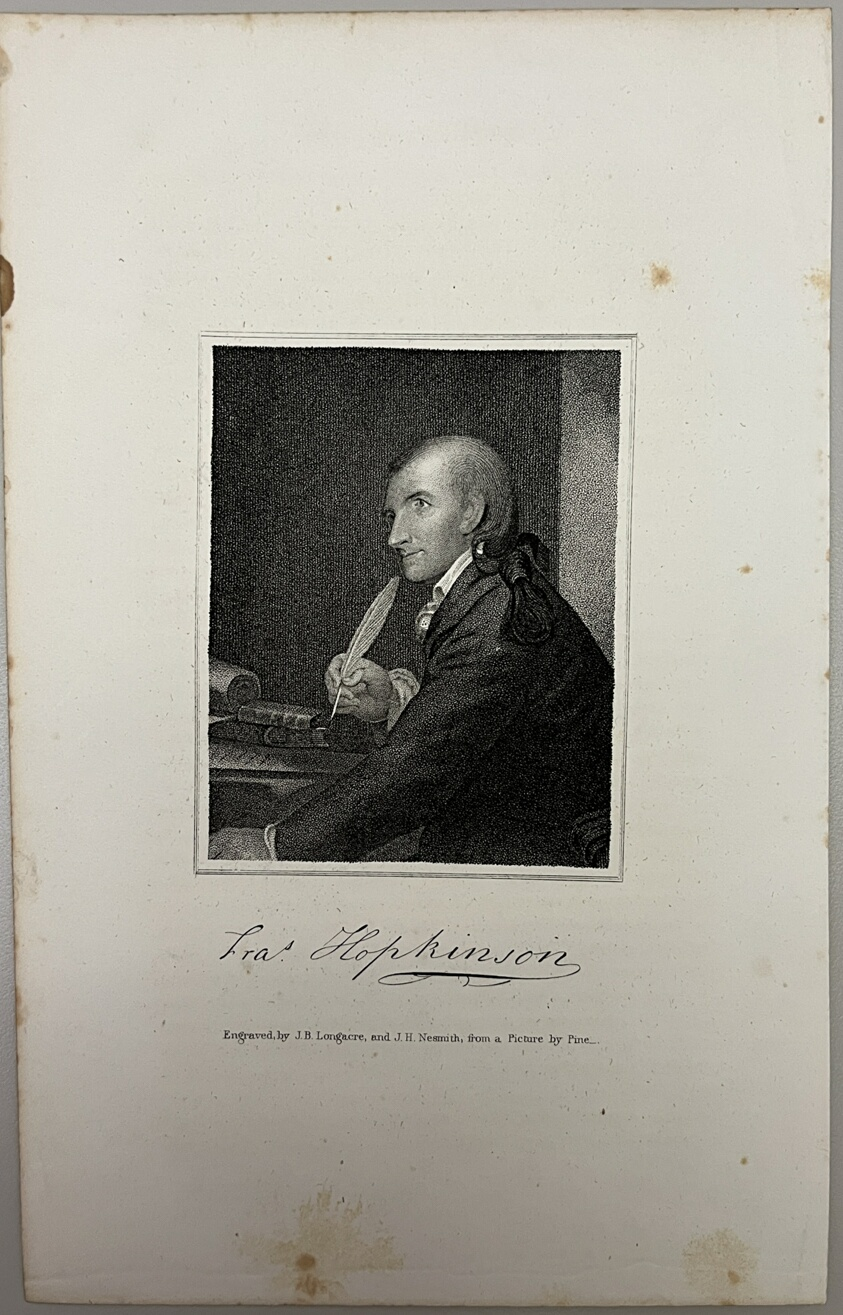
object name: Print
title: Francis Hopkinson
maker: James Barton Longacre (American, 1794-1869); and J.H. Nesmith (likely American, 19th century); after Robert Edge Pine (British, 1742-1788)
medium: Stipple engraving on paper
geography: United States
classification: reproduction; print; prints and drawing